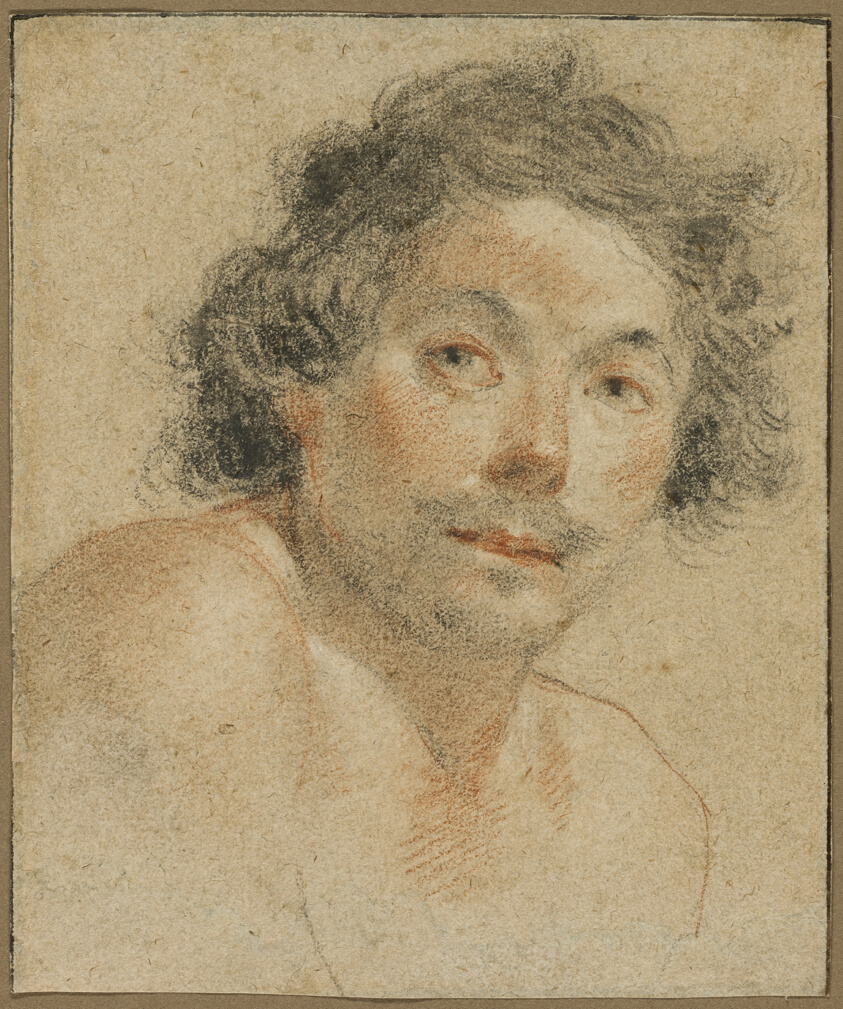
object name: Drawing and Watercolor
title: Bust Portrait of a Young Man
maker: Simon Vouet (French, 1590-1649)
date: 1620/25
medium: Black and red chalk, with stumping, on tan laid paper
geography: France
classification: drawings (visual works); prints and drawing